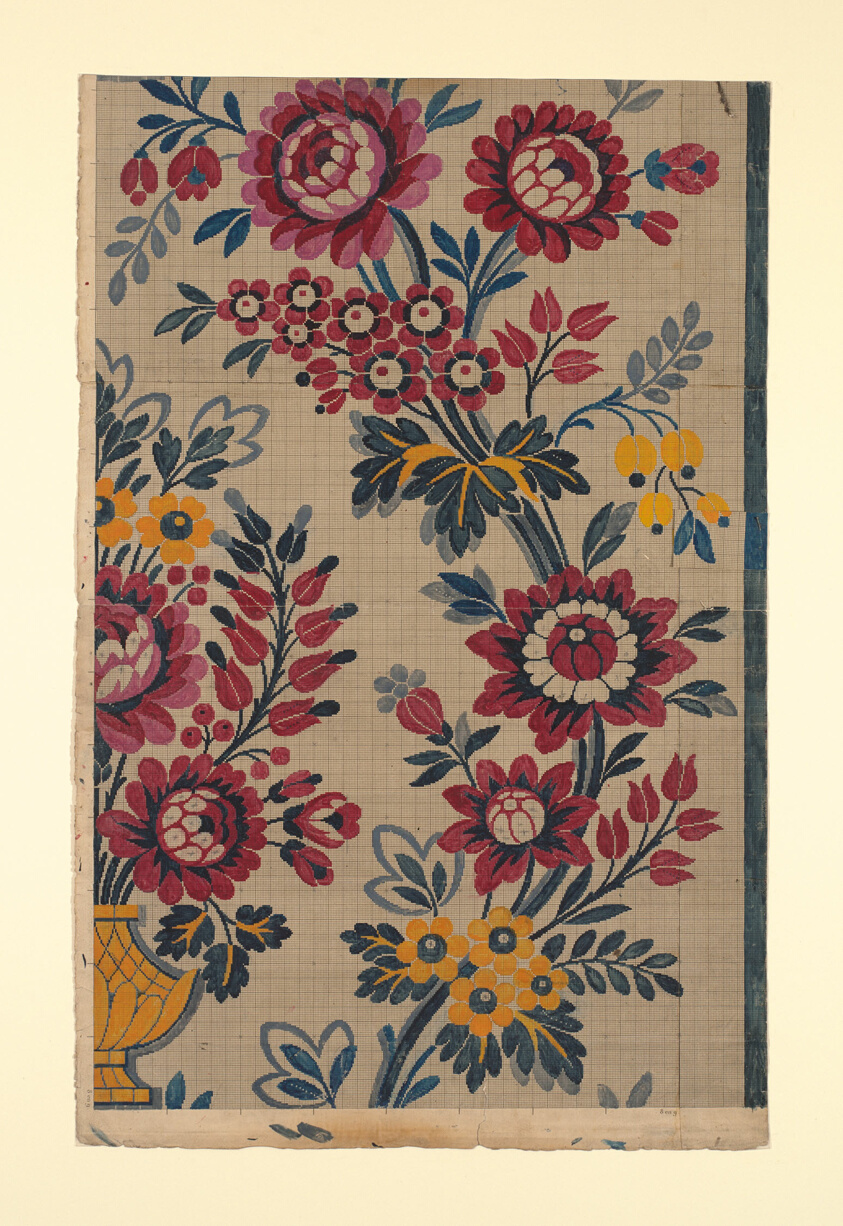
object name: Drawing and Watercolor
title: Mise-en-carte (Point-paper)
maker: Designed by Germain Frères; France, Lyon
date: After 1780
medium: Ink and gouache on hand drawn graph paper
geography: France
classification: textile; accessory - paper design; accessories (object genre)